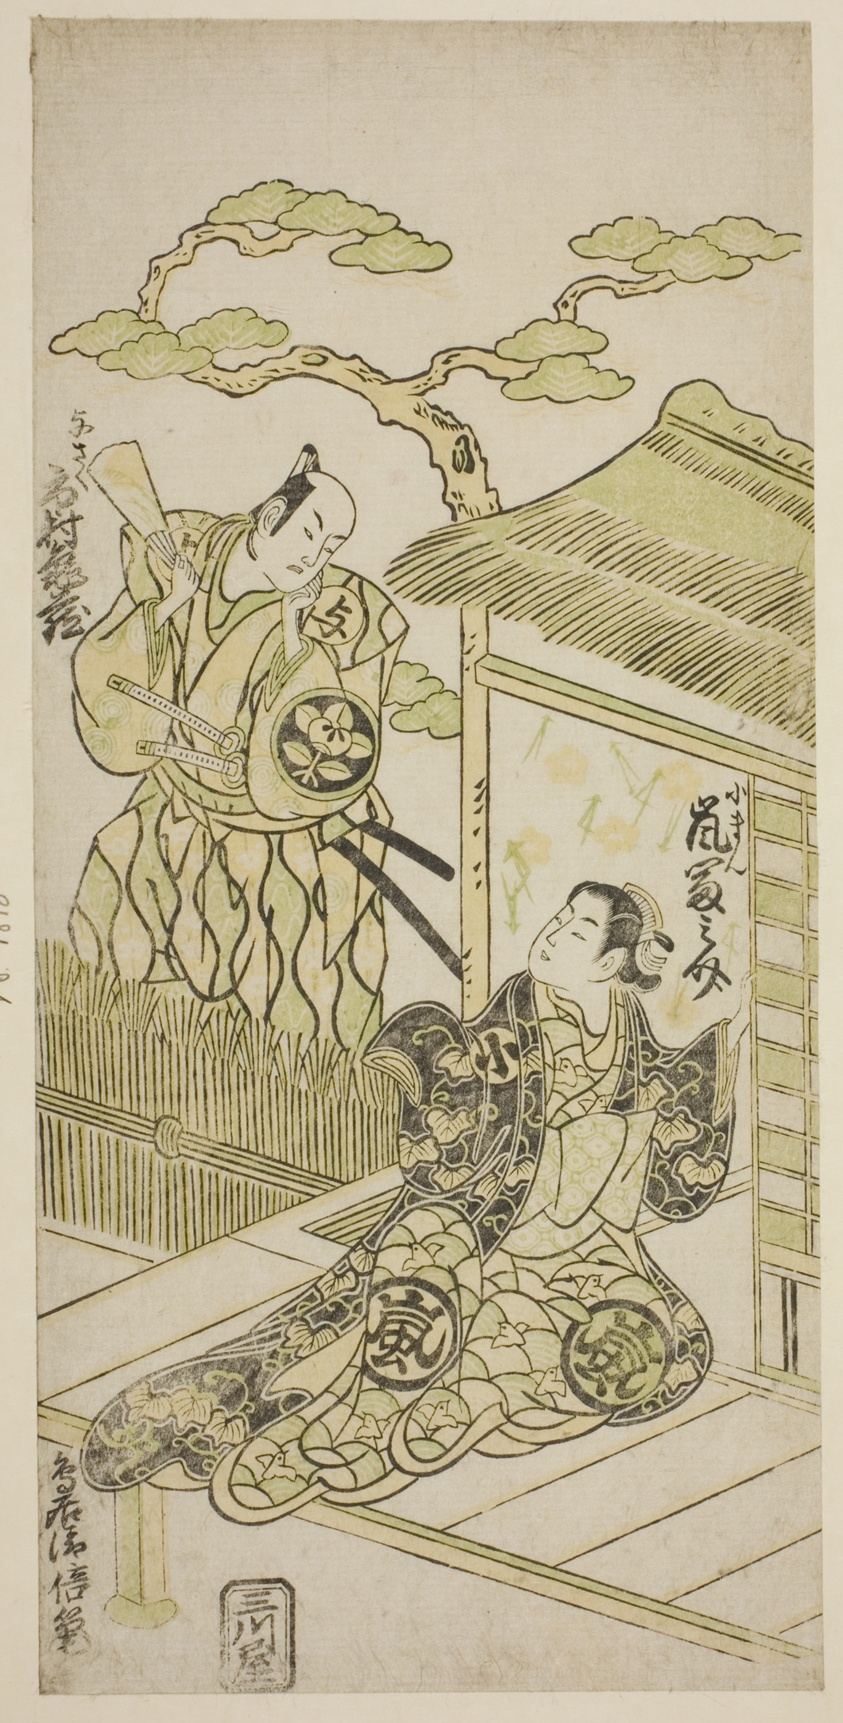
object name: Print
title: The Actors Ichimura Kamezo I as Yosaku and Arashi Tominosuke I as Koman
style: Japanese (culture or style)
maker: Torii Kiyomasu II (Japanese, 1706 (?)–1763 (?))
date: c. 1754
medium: Color woodblock print; hosoban, benizuri-e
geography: Japan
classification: woodblock print; print; asian art